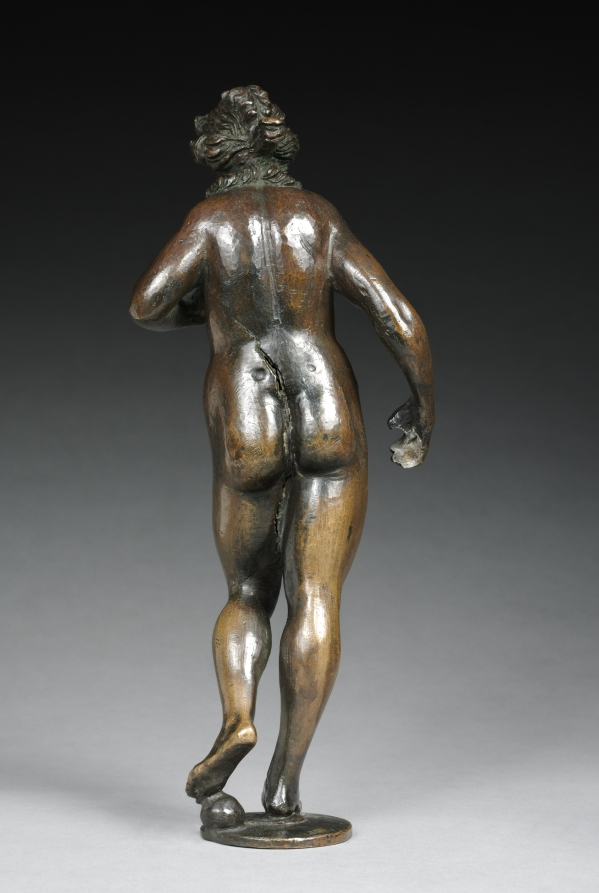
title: Fountain Figure of Abundance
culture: Germany, Augsburg, 16th century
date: c. 1530–40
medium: bronze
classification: Sculpture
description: The spout coming out of the breast indicates that this figure was part of a table fountain--a specialty of Augsburg artists. Her nudity and naturalistic proportions demonstrate the impact of Italian Renaissance art in southern Germany during the early 1500s.